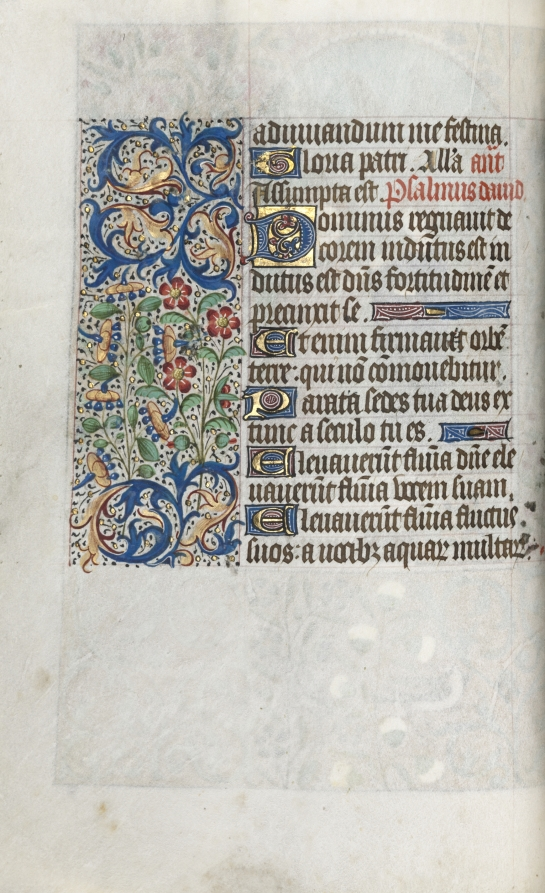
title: Book of Hours (Use of Rouen): fol. 39b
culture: France, Rouen, 15th century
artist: Master of the Geneva Latini (French, active Rouen, 1460–80)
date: c. 1470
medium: ink, tempera, and gold on vellum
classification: Bound Volume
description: In the late 1400s and early 1500s Rouen was an established and important center of book production. The city’s cathedral had a wealthy chapter that spent large sums of money to commission books and to maintain its extensive library. The stationers and booksellers would have likely been concentrated in or near the cathedral precinct. This artist, named after a manuscript now in Geneva, was Rouen’s principal illuminator during the second half of the 1400s.